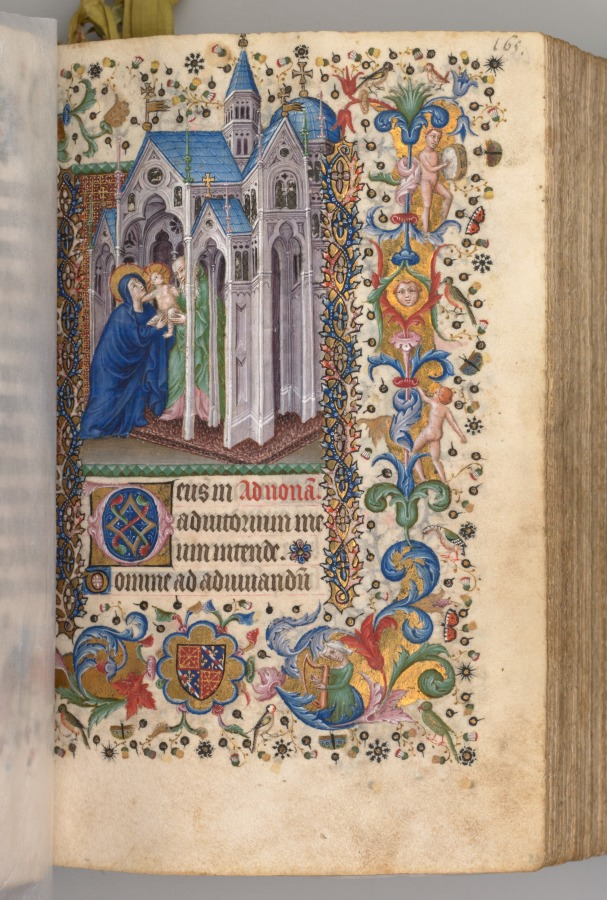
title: Hours of Charles the Noble, King of Navarre (1361-1425): fol. 82vr, Presentation in the Temple (Nones)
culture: France, Paris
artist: Master of the Brussels Initials and Associates (French)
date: c. 1405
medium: ink, tempera, and gold on vellum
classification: Bound Volume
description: This precious volume was obviously highly prized by its owner, the French-born King of Navarre, who had his coat of arms painted on no less than 20 folios. Rather than directly commissioning this manuscript from a specific workshop, it seems that Charles the Noble acquired his book of hours—perhaps ready-made for the luxury market—while on a trip to Paris in 1404–5. A collaborative effort, it contains six painting styles within its pages, those of two Italians, two Frenchmen, and two Netherlanders. The painter who was responsible for the planning and decoration of the book, and who produced 17 of the large miniatures, was a Bolognese artist known as the Master of the Brussels Initials. His principal assistant, responsible for most of the borders, was a Florentine who signed his name "Zecho" da Firenze on folio 208 verso.